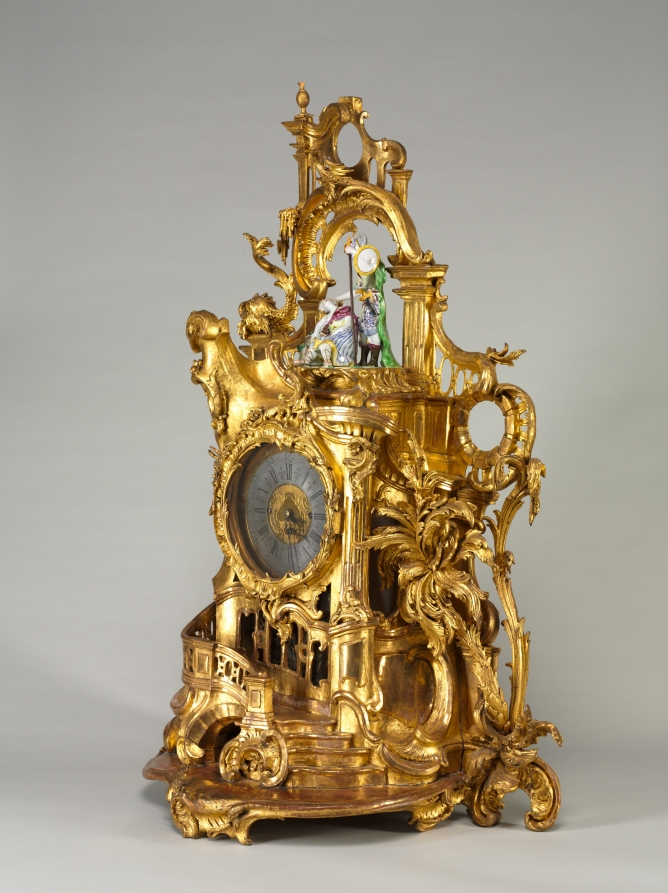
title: Clock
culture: Germany, 18th century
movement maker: Baumgartinger (German)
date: c. 1750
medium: carved and gilded wood, faience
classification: Furniture and woodwork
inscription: inscribed on face: Baumgartnger [sic] Mergentheim.